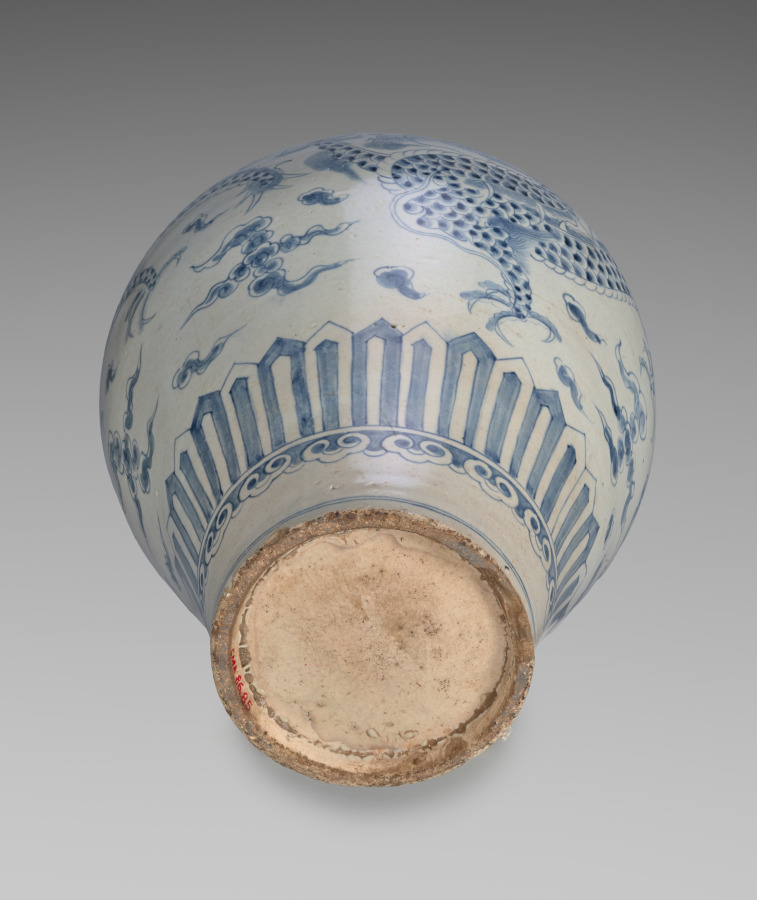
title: Jar with Dragon Design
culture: Korea, Joseon dynasty (1392–1910)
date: 1700s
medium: porcelain with underglaze blue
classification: Ceramic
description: As a mythical creature believed to make rain, the dragon served as a symbol of rulers in premodern East Asia. Here, a cobalt blue dragon is depicted flying through clouds to catch a flaming, wish-granting jewel called a cintamani. In the royal court, the shorter type of dragon jar held wine, while the tall type, like this one, held flowers. This porcelain once belonged to Robert W. Moore, who developed an interest in Korean art while serving in the US Army in South Korea during the 1950s and 1960s. Later, the CMA acquired this important work through an auction sale in 1986.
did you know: A mythical creature believed to have the power to make rain, the dragon is a prominent symbol of rulers in premodern East Asia; the image of dragons was used exclusively for the king's paraphernalia.